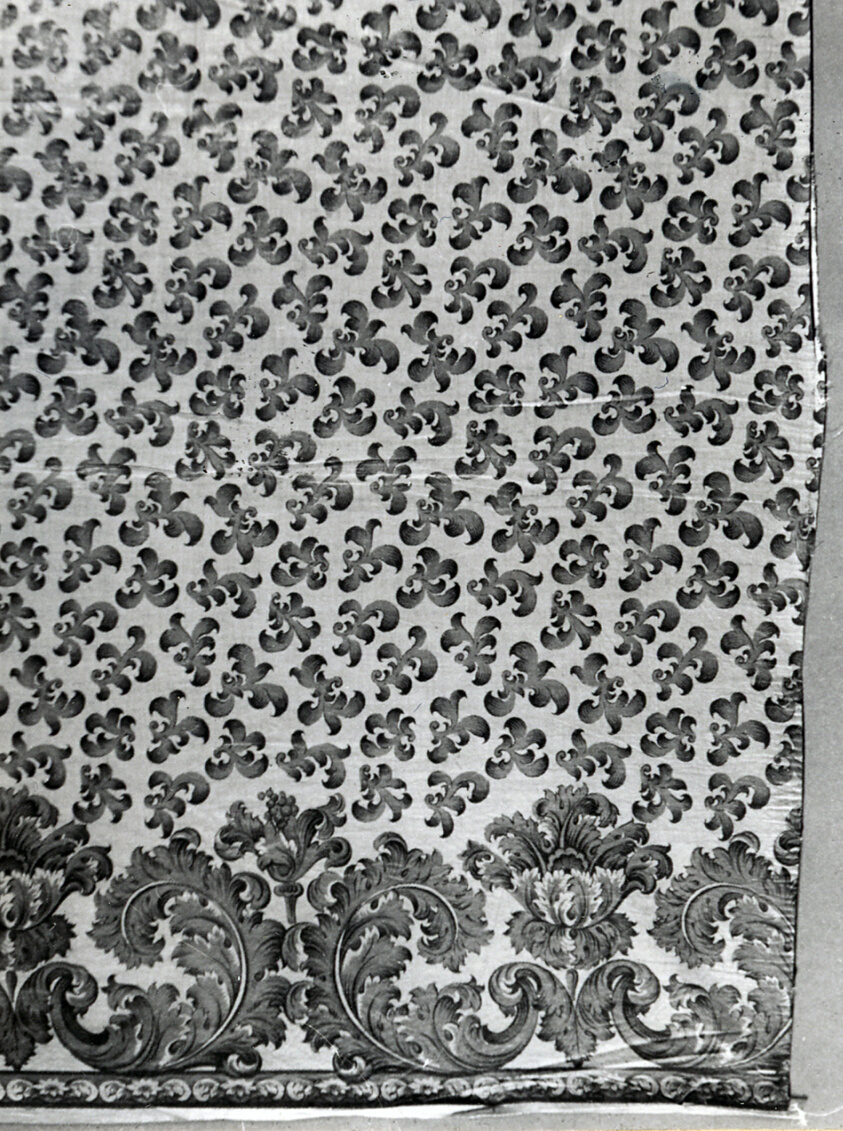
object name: Textile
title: Panel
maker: England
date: c. 1810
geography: England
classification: textile; weaving - printed